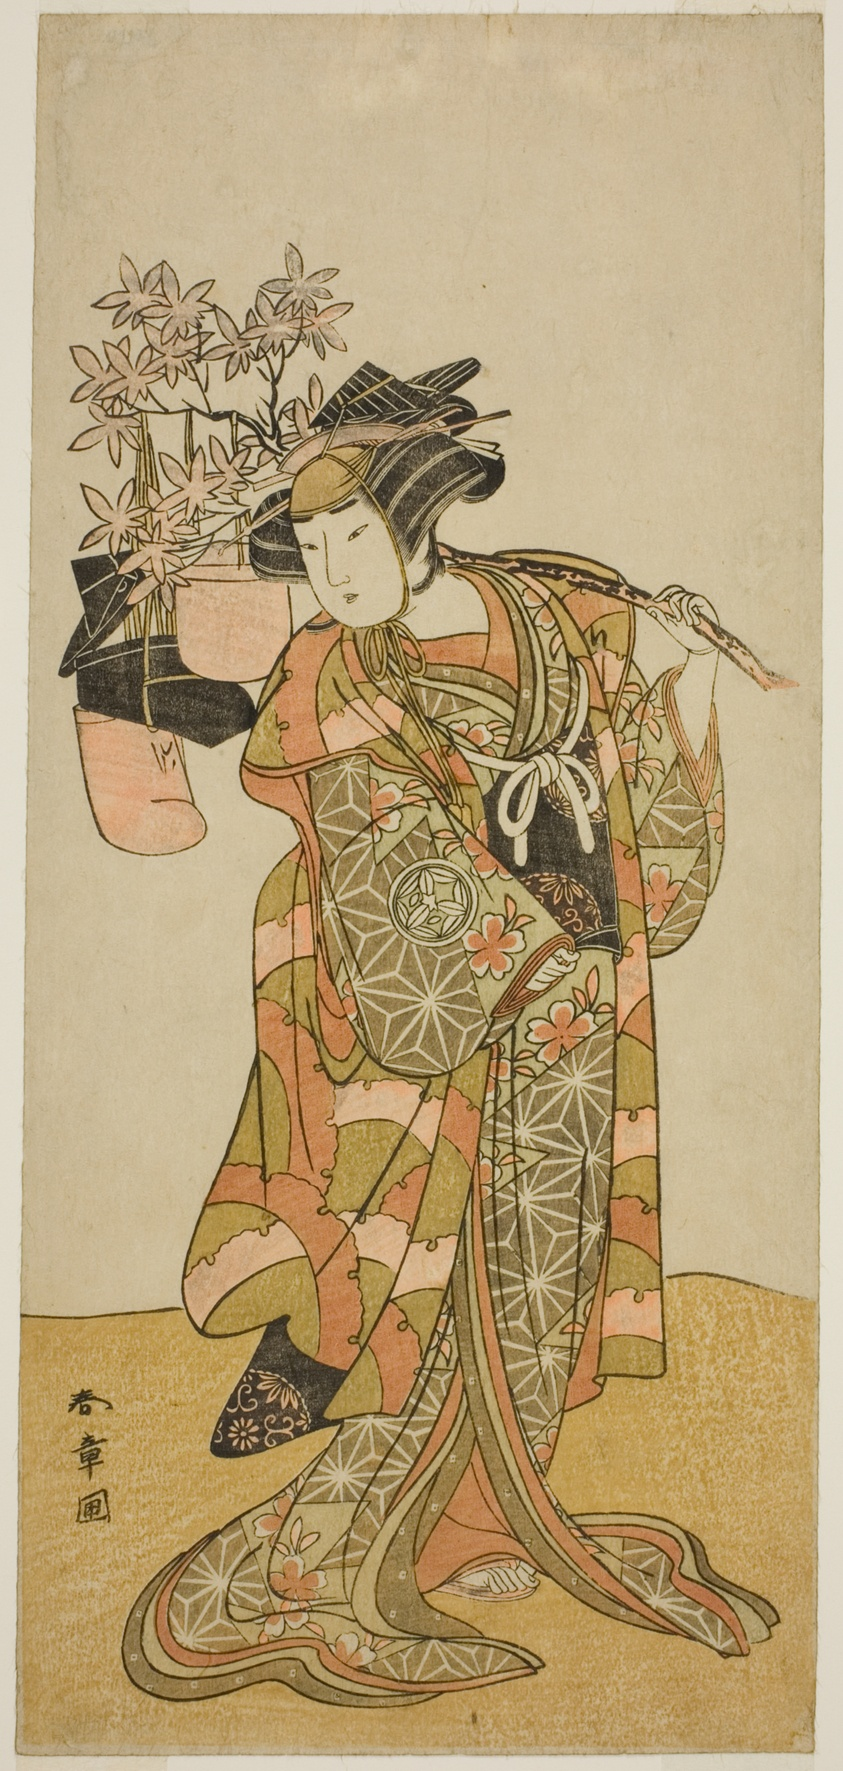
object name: Print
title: The Actor Yamashita Kinsaku II as Odai, an Eboshi (Hat) Seller, in the Play Hana-zumo Genji Hiiki, Performed at the Nakamura Theater in the Eleventh Month, 1775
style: Japanese (culture or style)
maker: Katsukawa Shunsho 勝川 春章; Japanese, 1726-1792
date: c. 1775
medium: Color woodblock print; hosoban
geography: Japan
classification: woodblock print; print; asian art